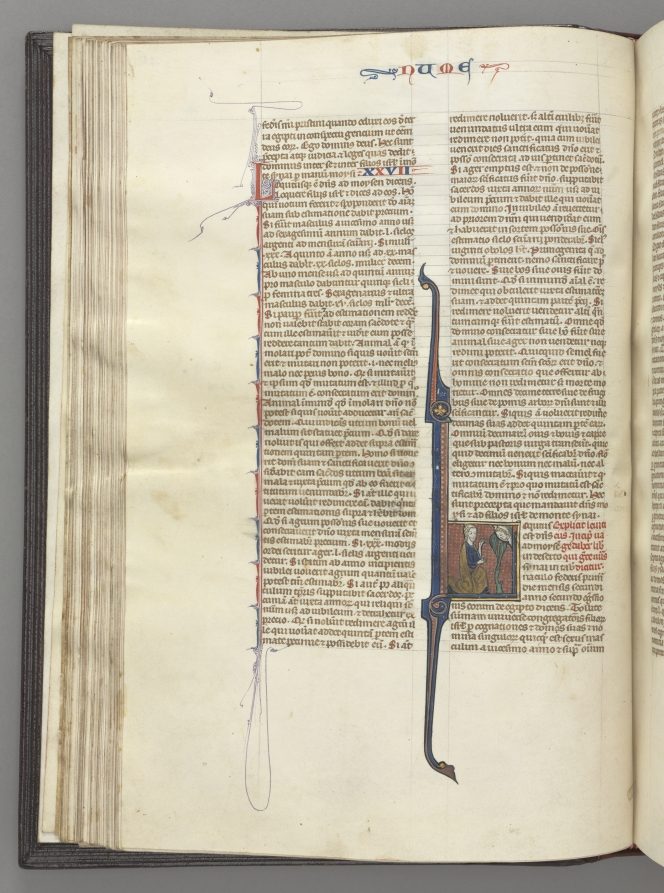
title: Fol. 46v, Numbers, historiated initial L, Moses with horns, kneeling before God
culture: Southern France, Toulouse(?), 13th century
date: c. 1275–1300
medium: ink, tempera and gold on vellum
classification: Bound Volume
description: Biblical manuscripts were highly prized and important possessions of churches, monasteries, cathedral schools, and universities throughout medieval Europe. The biblical texts were known as the vulgate, the translations made by Saint Jerome in the fourth century from Hebrew and Greek into Latin, which became the definitive and official Latin version of the Roman Church. In the 13th century, the bible was, for the first time, produced as a single volume with an officially sanctioned sequence to its books and chapters as illustrated by this example. The very extensive decoration of this bible is arranged hierarchically to indicate the relative importance of the various texts so that full or almost full-page initials mark the openings of the first prologue, Genesis, and the first Gospel; historiated initials mark the beginning of each book and illuminated initials mark the Prologues.